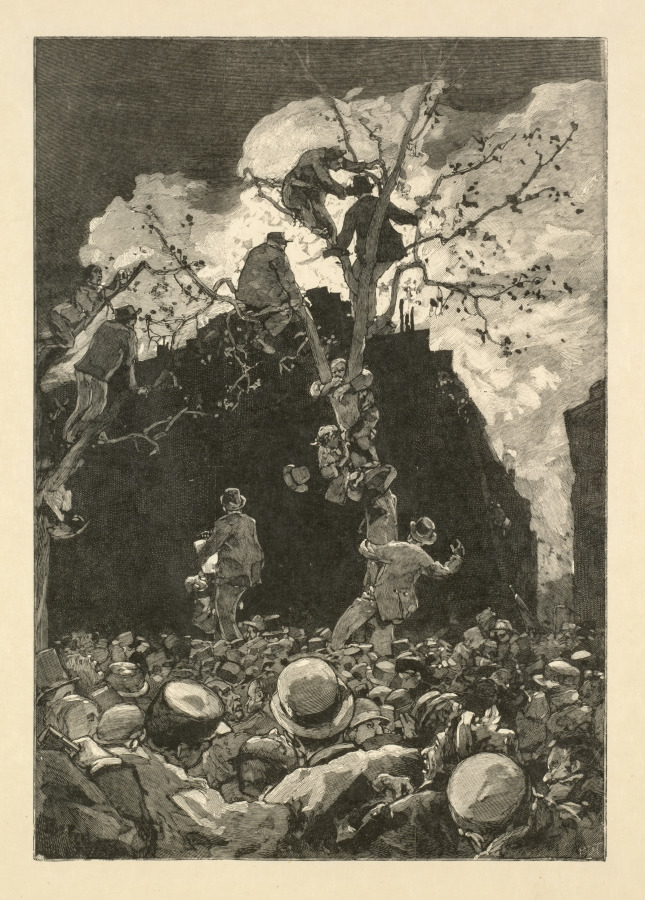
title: Men Watching a Fire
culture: France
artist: Auguste Lepère (French, 1849–1918); printed with the collaboration of B. D. F. Tony Beltrand (French, 1847–1904); Eugène Dété (French, 1848–1922) and Frédéric Rognon called Florian (French, 1858–1926)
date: c. 1870–1900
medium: wood engraving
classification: Print